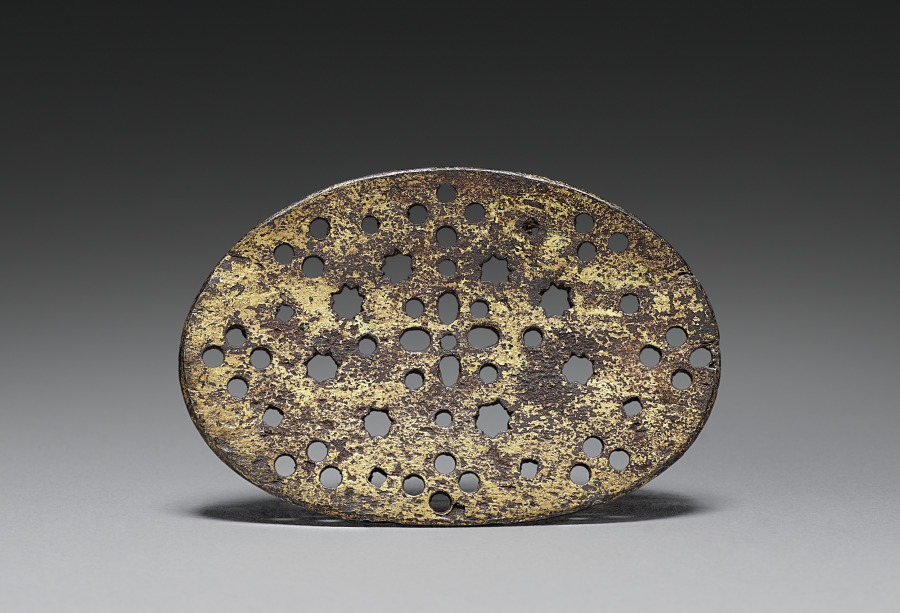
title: Metal Disk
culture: India (?)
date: before 1916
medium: Gilded metal pierced with a pattern of stars and circles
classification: Metalwork